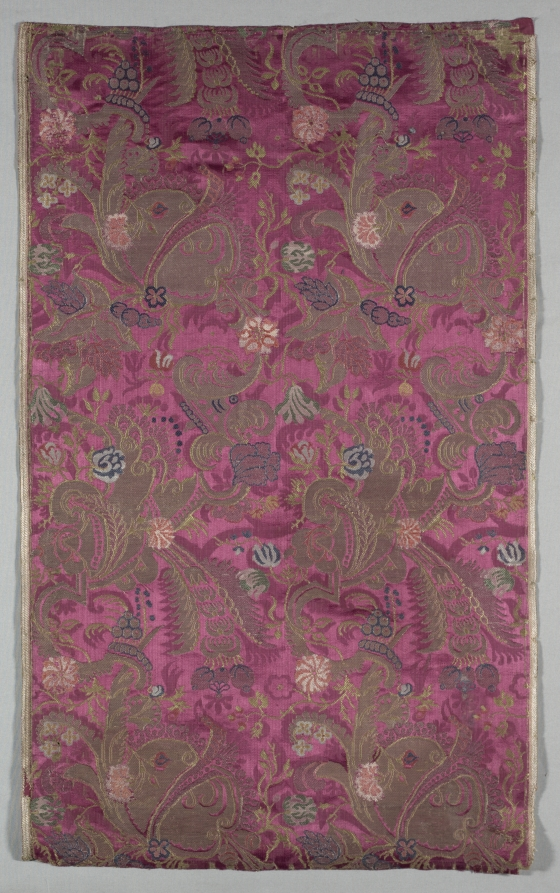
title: Length of Textile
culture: France or Italy, early 18th century, period of Louis XIV (1643-1715)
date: c. 1700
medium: brocade; silk, gold and silver threads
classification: Textile